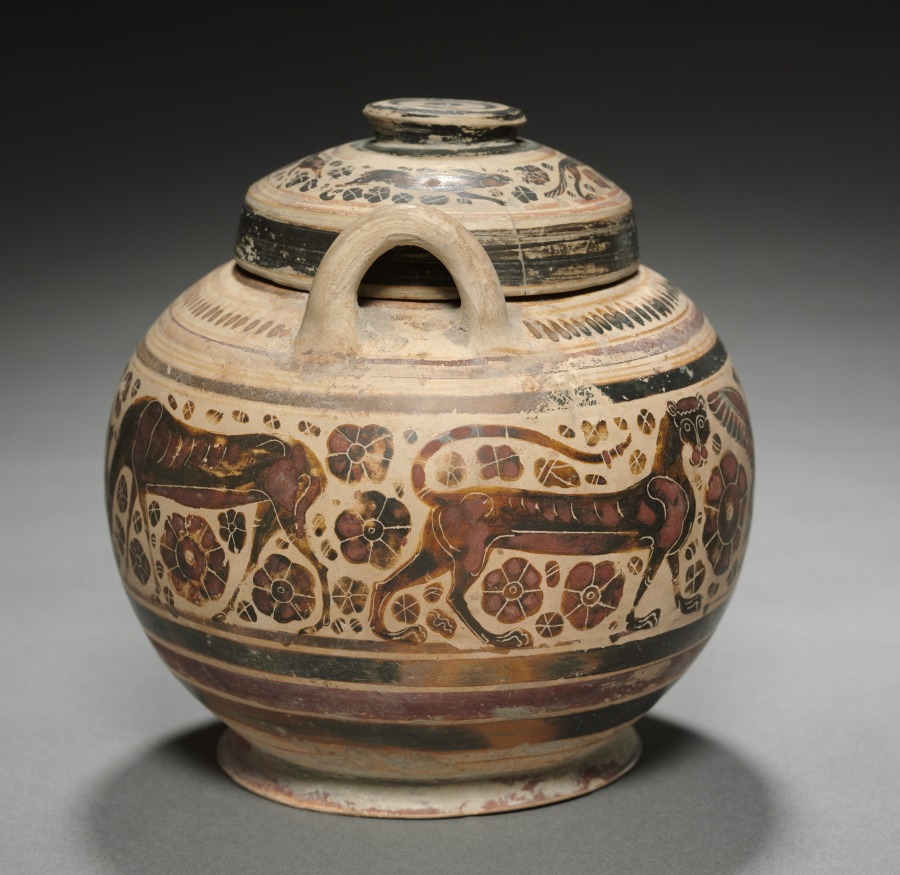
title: Black-Figure Pyxis (Cylindrical Lidded Box): Animals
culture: Greek, Corinthian (Middle-Late)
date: 500s BCE, with modern painting and incision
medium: ceramic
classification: Ceramic